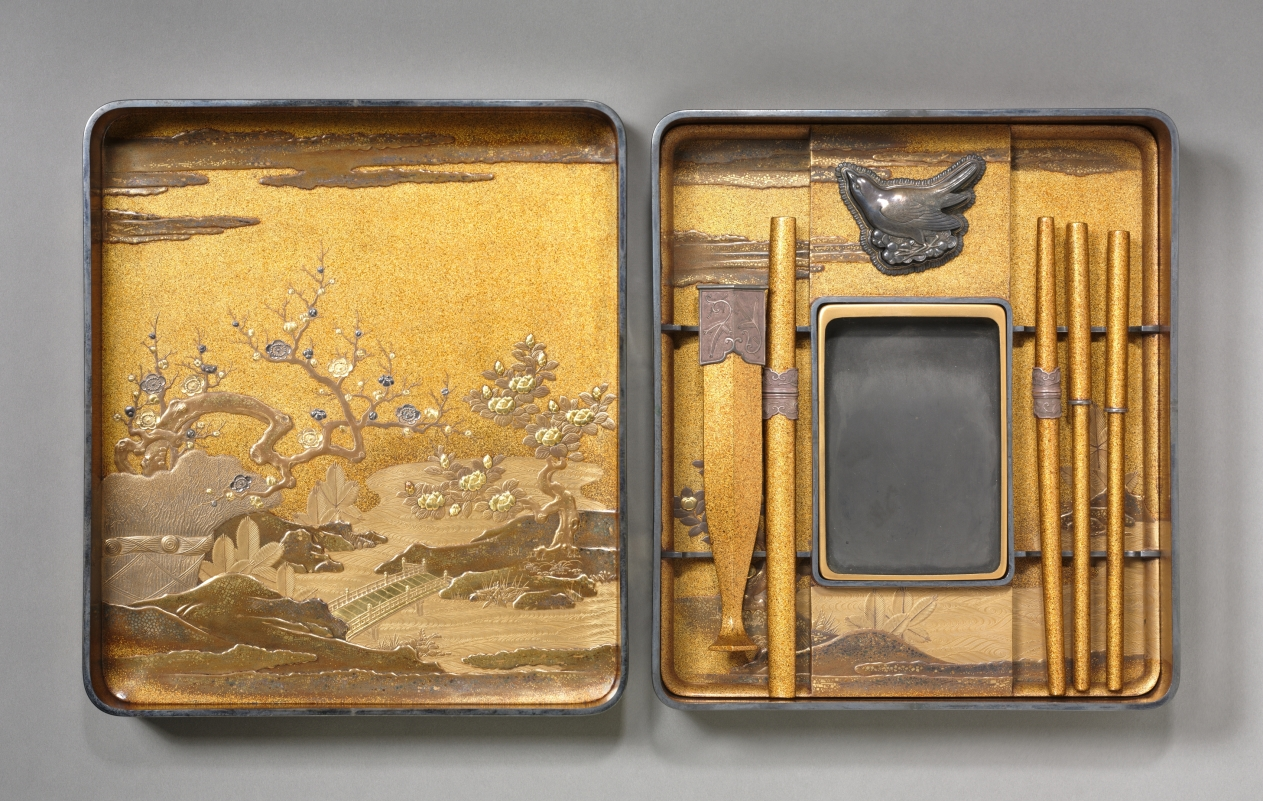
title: Writing Box (Suzuribako) with the “First Song” (Hatsune) Chapter from the Tale of Genji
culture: Japan, Meiji period (1868–1912)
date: early 1900s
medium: Lacquered wood with gold and silver sprinkled powder (maki-e), foil application (kirikane), and metal inlay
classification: Lacquer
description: The design of this box was inspired by an object in the 1639 lacquer wedding set of Chiyohime, the daughter of the shogun (ruler). Information about the set became available in the Meiji period, leading some lacquer artists to emulate its designs. This box features a scene from the chapter “First Song” (Hatsune) of the Tale of Genji, in which Prince Genji and his love Murasaki enjoy her garden. It incorporates the written characters for “first” (初, hatsu) and “sound” (音, ne), indicating the first song of the warbler in spring, associated with the new year—the water dropper for mixing the ink is in the shape of this bird.